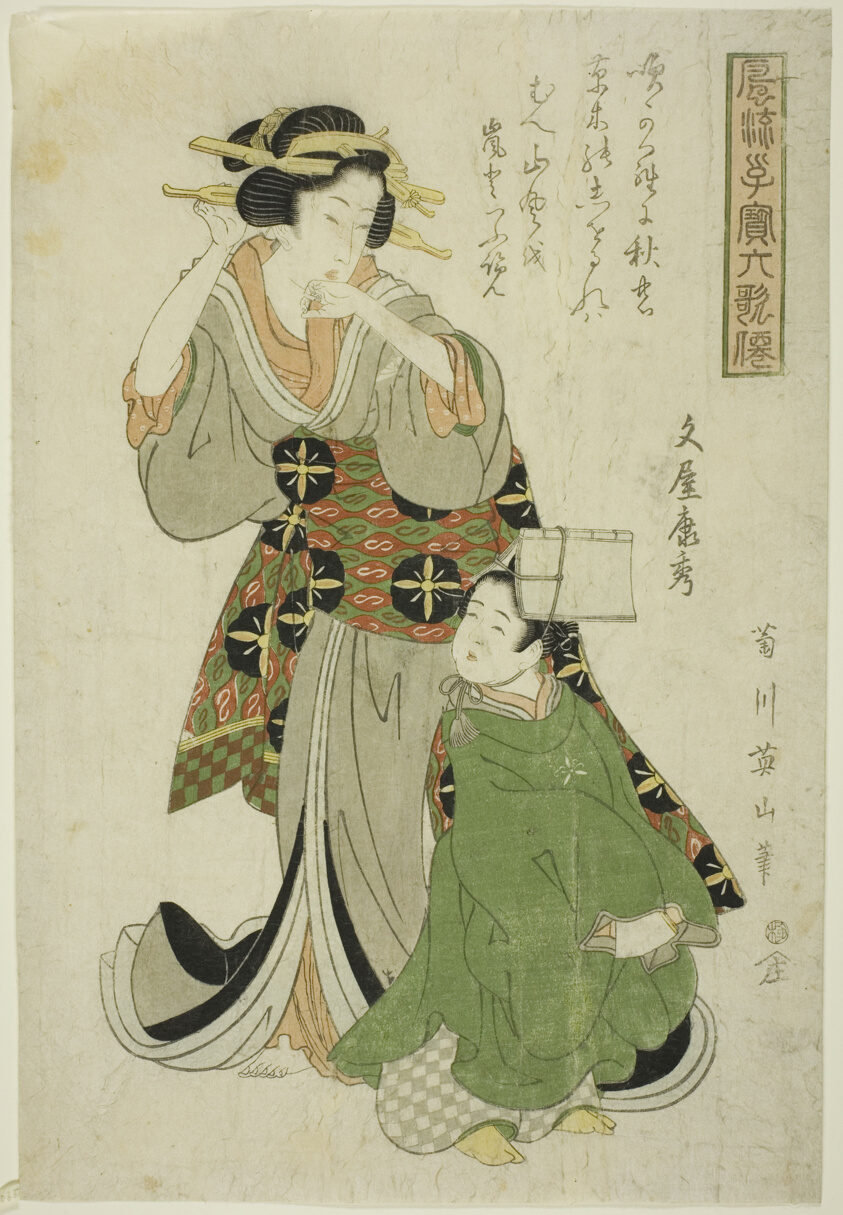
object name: Print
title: Bunya no Yasuhide, from the series "Fashionable Children as the Six Immortal Poets (Furyu kodakara rokkasen)"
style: Japanese (culture or style)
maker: Kikukawa Eizan (Japanese, 1787-1867)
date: c. 1814/17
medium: Color woodblock print; oban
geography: Japan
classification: woodblock print; print; asian art